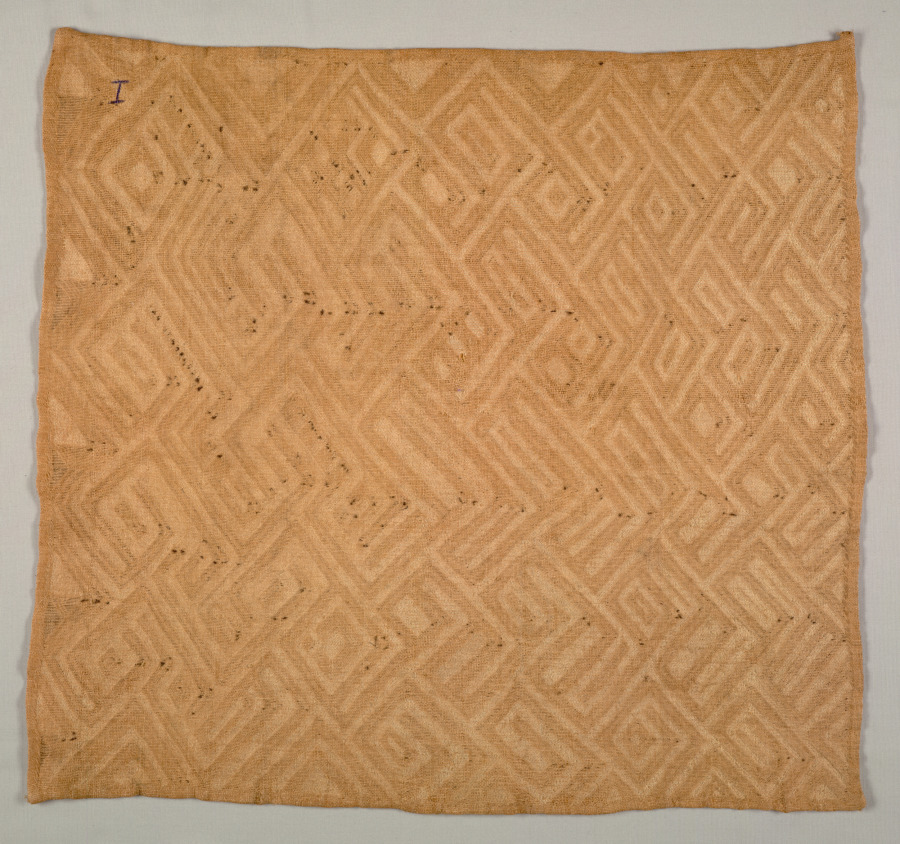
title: Embroidered Raffia Pile Cloth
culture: Africa, Central Africa, Democratic Republic of Congo, Kuba peoples, 20th century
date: 1900s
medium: Raffia and dye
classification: Textile